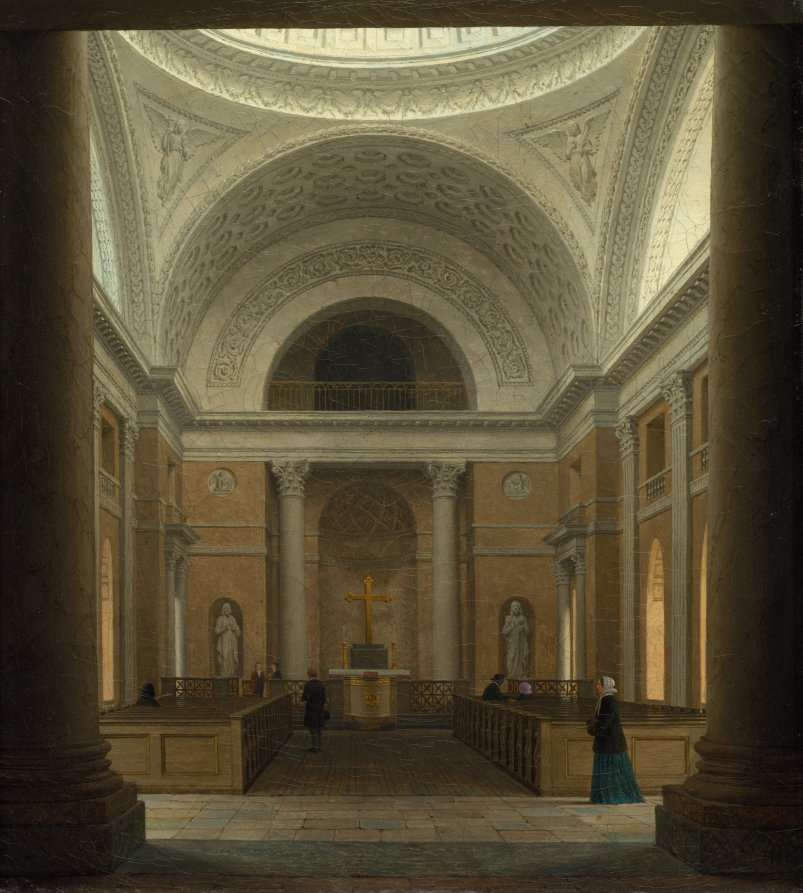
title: The Slotskirken of Christiansborg, Copenhagen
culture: Denmark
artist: Heinrich Hansen (Danish, 1821–1890)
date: c. 1850s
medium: oil on fabric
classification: Painting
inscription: Signed in black paint lower right corner: H. H.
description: Among the many important neoclassical buildings erected in Copenhagen during the 1800s was the Slotskirke or royal chapel, completed in 1826. Heinrich Hansen painted this sober, quiet view of the chapel's interior, carefully rendering its delicate shadows and patches of sunlight. Probably inspired by 17th-century Dutch paintings of church interiors, the artist accurately portrayed many of the building's features. The angels in the pendentives (the triangular areas beneath the circular dome) were carved by the great Danish sculptor Bertel Thorvaldsen (1768-1884).